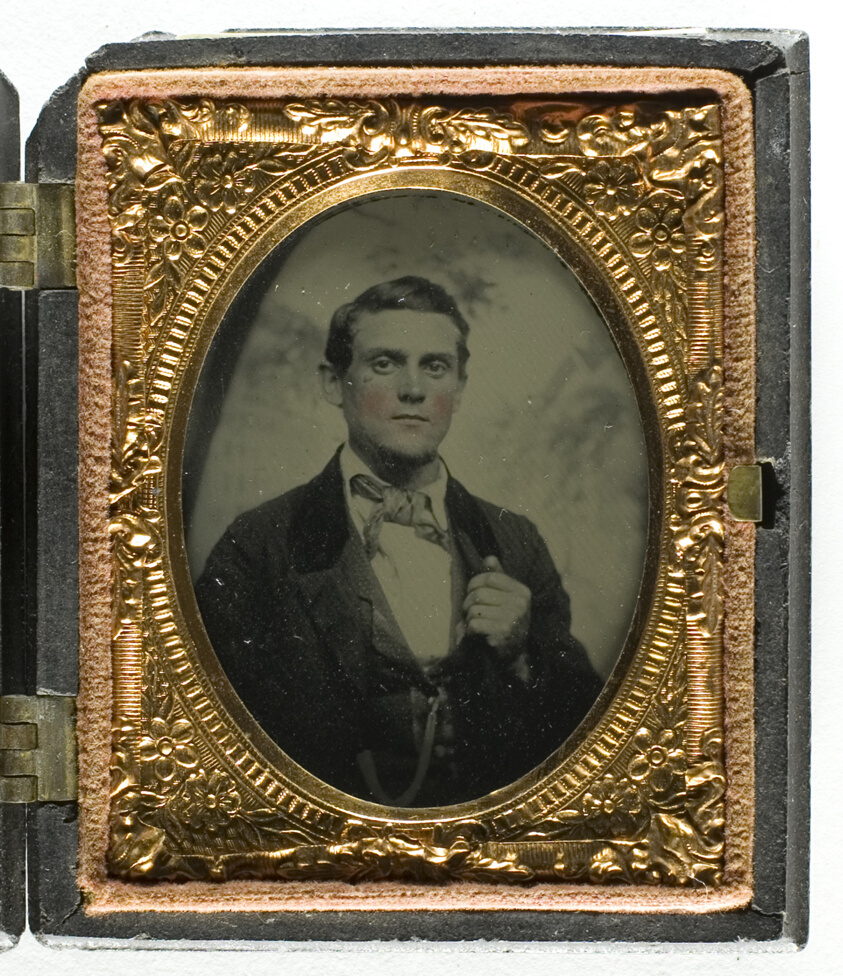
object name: Photograph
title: Untitled (Young Man)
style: 19th century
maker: Artist unknown; 19th century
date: 1850/90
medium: Ambrotype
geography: Unknown Place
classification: ambrotype; photographic process; photography; photograph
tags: portraits, portraits: male subject, photography